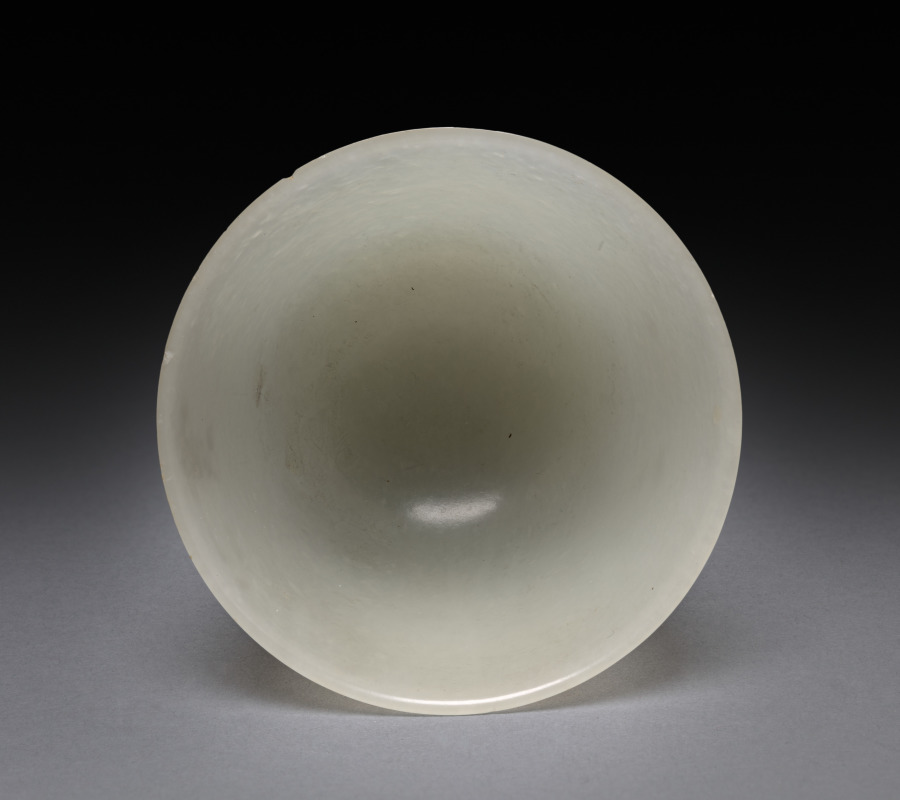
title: Lotus-shaped Dish and Cup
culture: China, Qing dynasty (1644–1911), Qianlong reign (1736–95)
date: 1736–95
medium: jade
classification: Jade